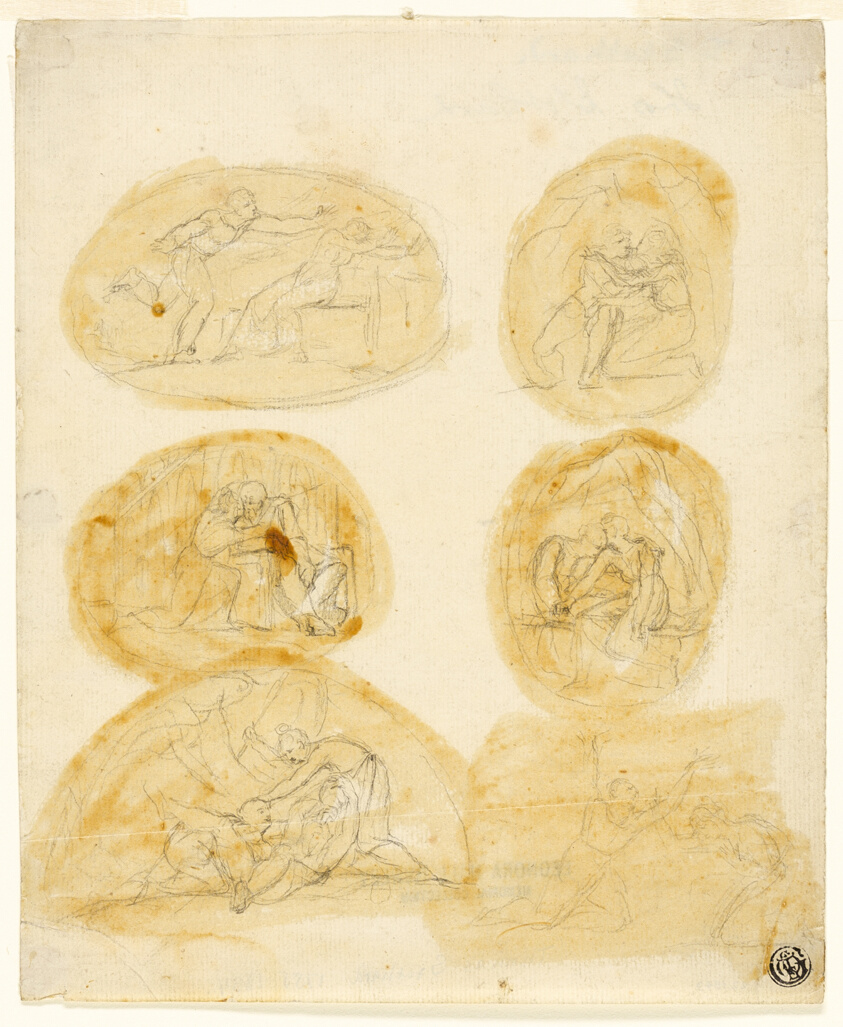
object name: Drawing and Watercolor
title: Six Vignettes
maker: Attributed to Thomas Stothard; English, 1755-1834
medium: Graphite, brushed with shellac, on ivory laid paper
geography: England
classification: graphite; drawings (visual works); prints and drawing